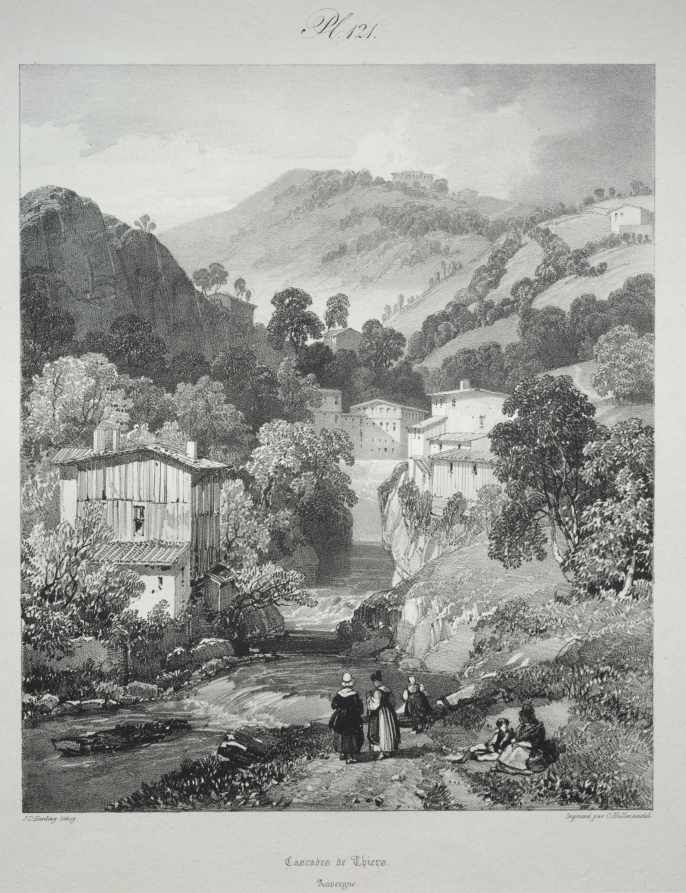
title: Voyages pittoresques et romantiques dans l'ancienne France. Auvergne: Cascades de Thiers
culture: England, 19th century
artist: James Duffield Harding (British, 1798–1863)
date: 1825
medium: lithograph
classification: Print